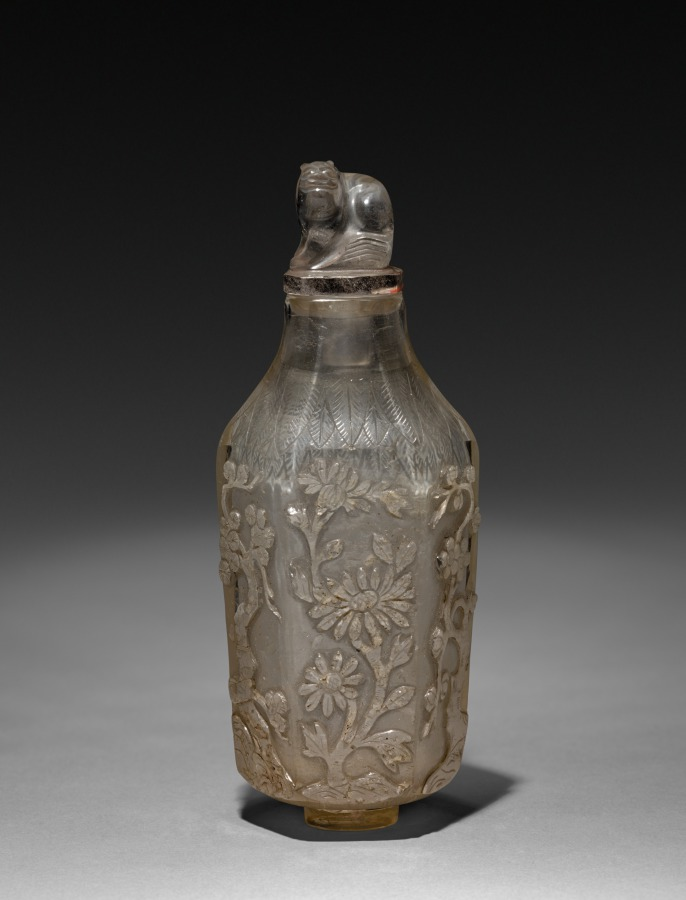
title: Six-Sided Bottle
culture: China, Qing dynasty (1644-1911)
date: 1644–1911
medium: rock crystal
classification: Rock crystal